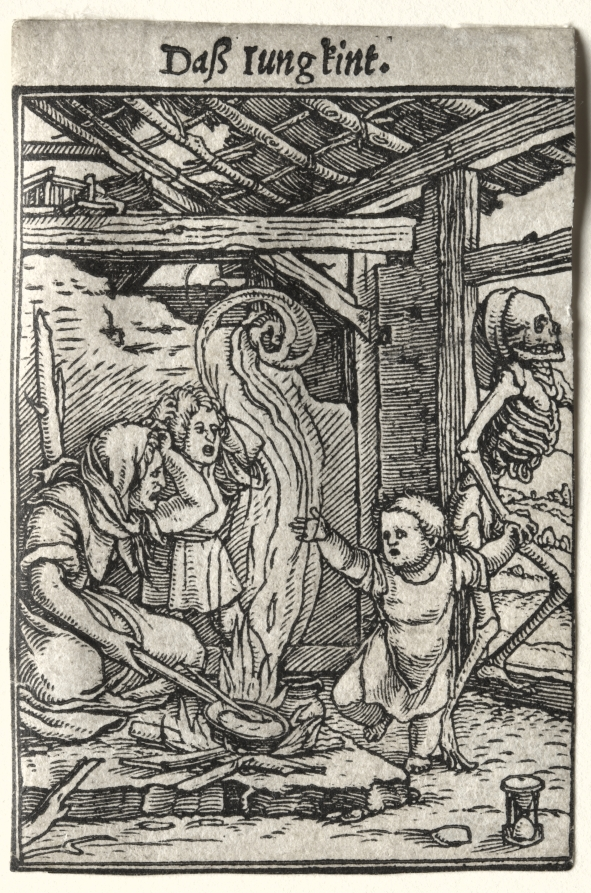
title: Dance of Death: The Child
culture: Germany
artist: Hans Holbein the Younger (German, active England and Switzerland, 1497/98–1543)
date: c. 1526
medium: woodcut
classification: Print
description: Dance of Death is the most celebrated series of woodcuts designed by Holbein. The forty-one blocks were cut by Hans Lützelburger in the years immediately before his death in 1526, though the set was not published until 1538. Dance of Death originated as a drama in the middle of the 14th century. Following widespread epidemics such as the black plague, these plays took place in a cemetery or churchyard. Actors, dressed in pale costumes painted to resemble skeletons, personified Death and summoned a group of people from all social classes in a dancelike procession. In a period when the life span was short, the purpose of the Dance of Death was to remind the populace to prepare for the Last Judgement.